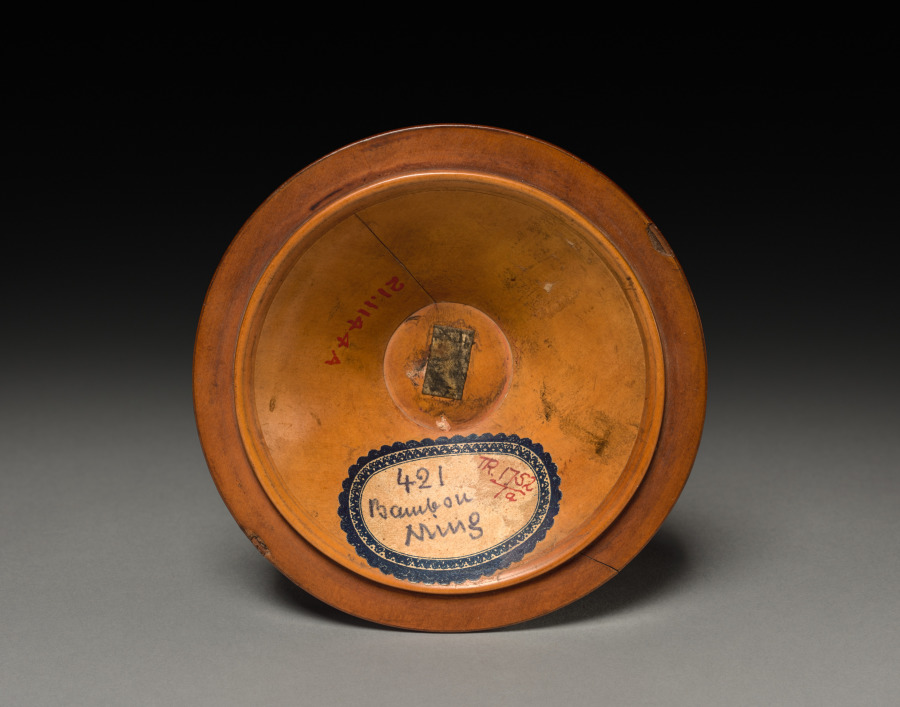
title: Tripod with Cover (lid)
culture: China, Qing dynasty (1644-1911)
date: late 1700s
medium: carved wood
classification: Wood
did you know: Each leg of the tripod is decorated with a lion head.